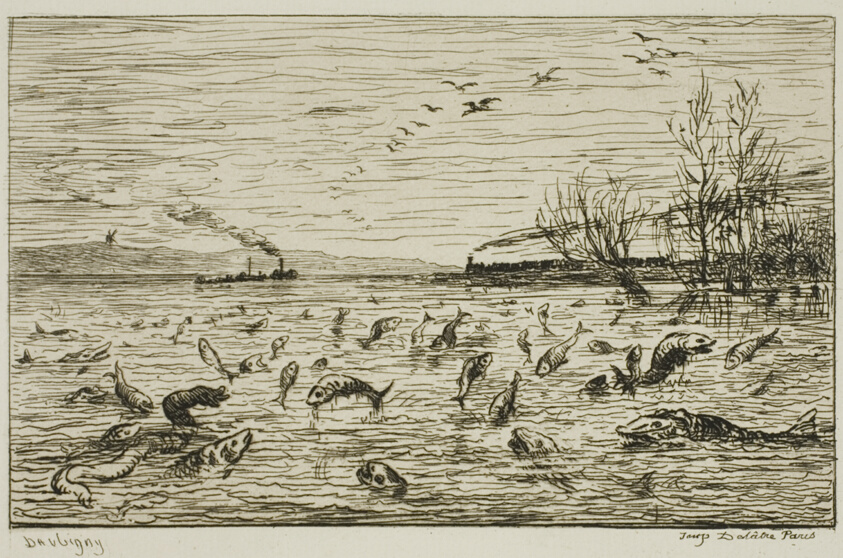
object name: Print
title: Celebration of the Fish on the Departure of the Ship's Boy (The Fish)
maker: Charles François Daubigny (French, 1817-1878)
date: 1861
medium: Etching on ivory laid paper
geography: France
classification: etching; print; prints and drawing